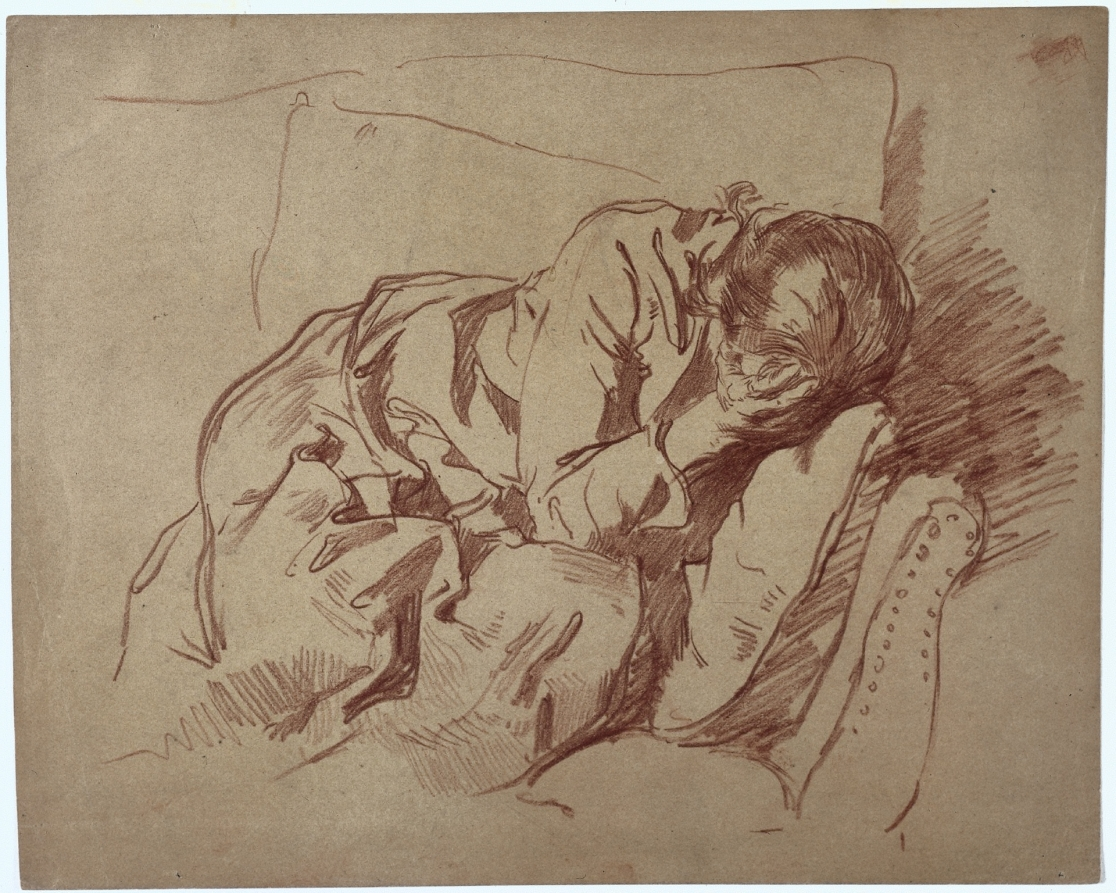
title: Lamenting Woman (Sarah H. Crone)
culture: America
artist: Samuel H. Crone (American, 1858–1913)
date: 1880s or 1890s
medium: red chalk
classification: Drawing